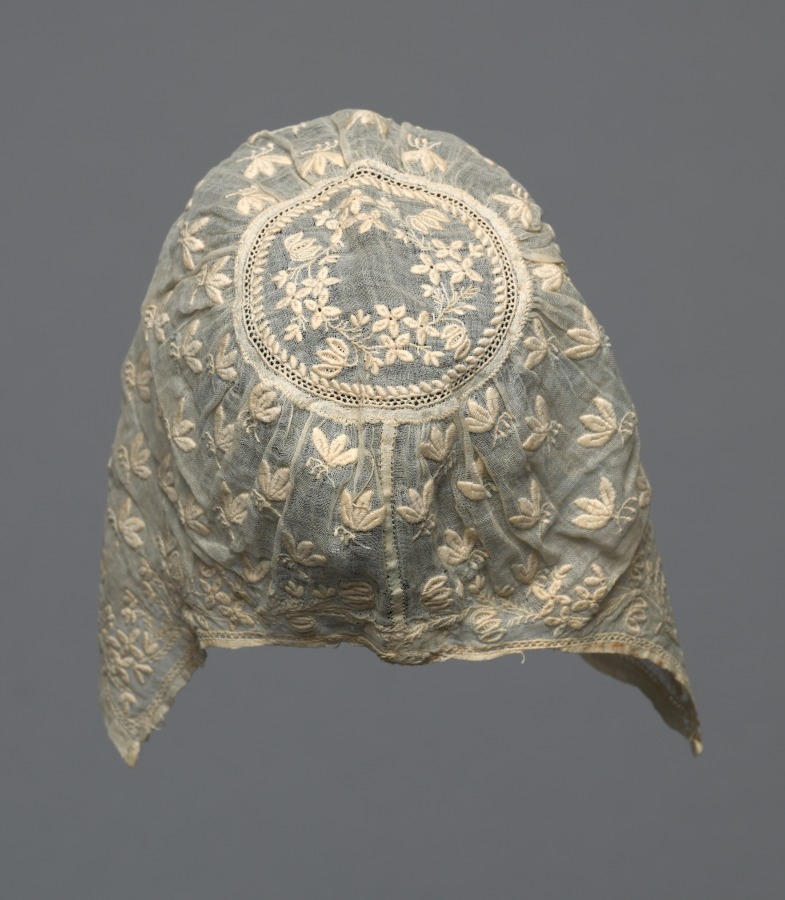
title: Cap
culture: America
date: c. 1836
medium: Linen: embroidered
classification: Embroidery